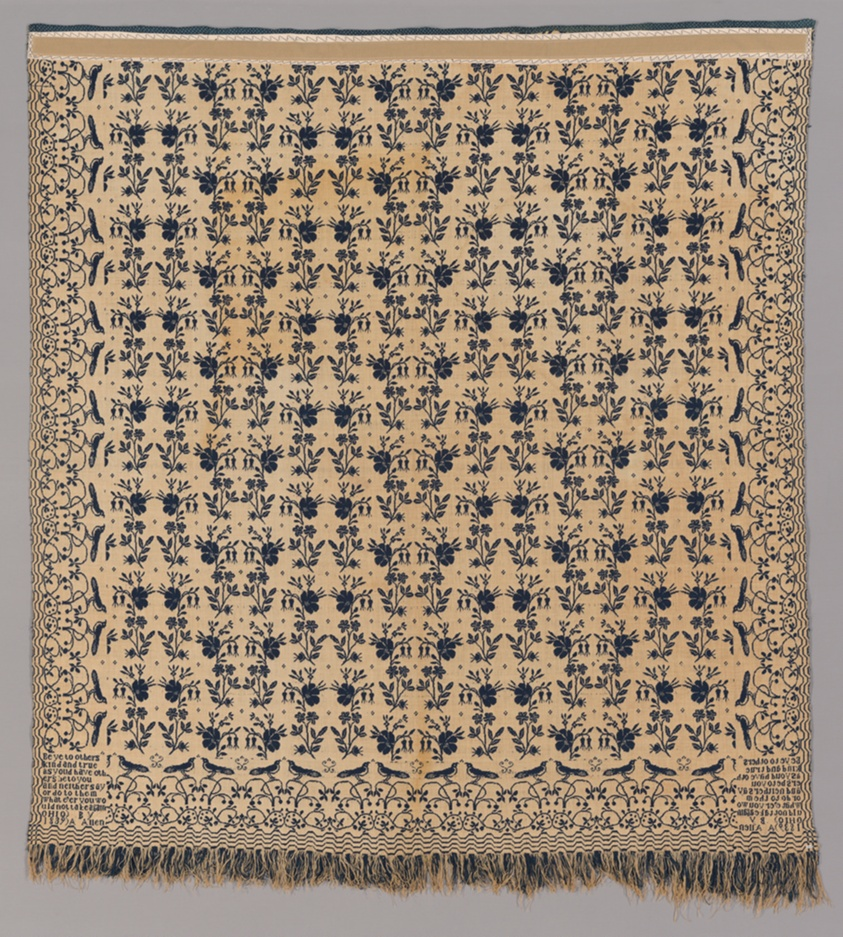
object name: Textile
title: Coverlet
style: 19th century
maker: Abram Allen (American, born Irish, c. 1796- after 1860); United States, Ohio, Clinton County, Wilmington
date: 1839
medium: Cotton and wool, plain weave double cloth with main warp fringe; woven on loom with Jacquard attachment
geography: Ohio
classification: textile; coverlet; weaving - coverlet; weaving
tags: flowers, words, vines, primrose, fruit, friendship, foliage, birds, bird, coverlet